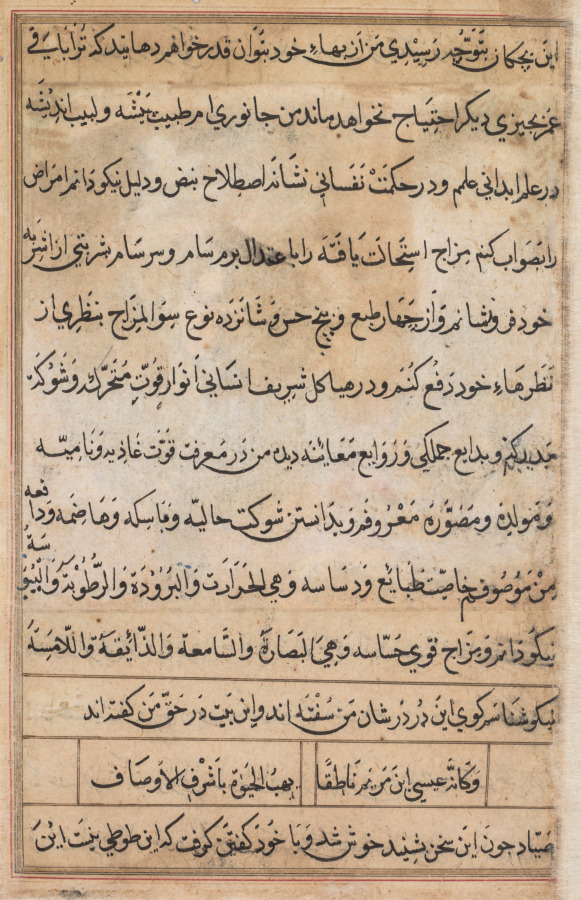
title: Page from Tales of a Parrot (Tuti-nama): text page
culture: Mughal India, court of Akbar (reigned 1556–1605)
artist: attributed to Basavana (Indian, active c. 1560–1600)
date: c. 1560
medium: gum tempera, ink, and gold on paper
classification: Painting